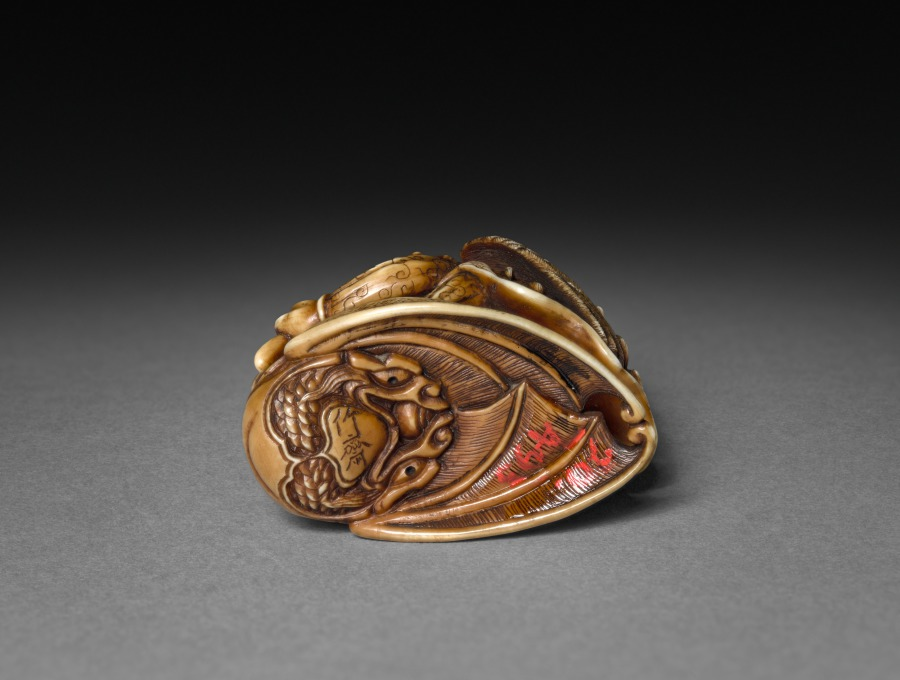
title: Tengu Travelling as a Priest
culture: Japan, Edo period (1615–1868)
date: early to mid-1800s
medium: ivory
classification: Netsuke